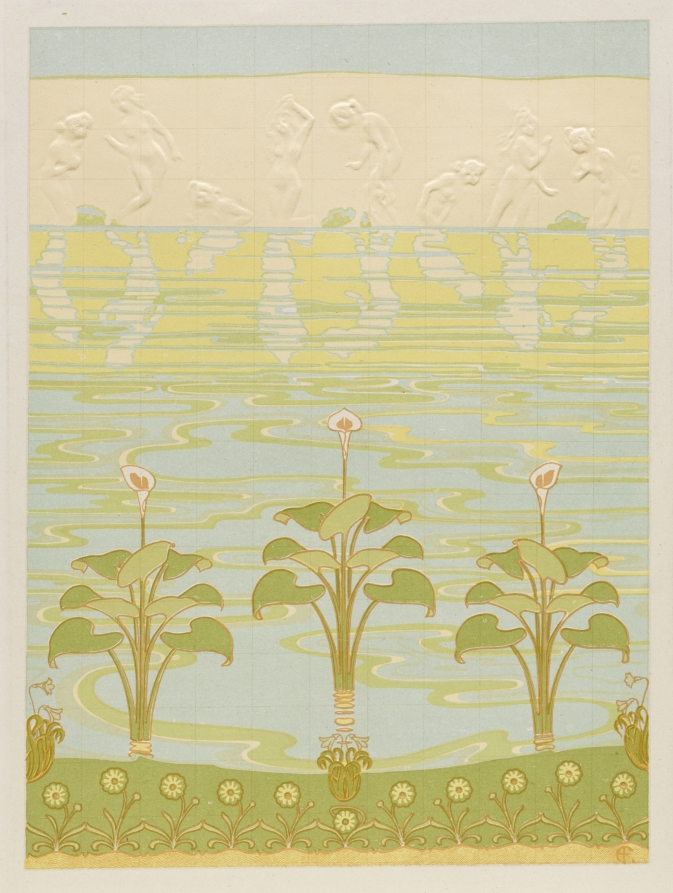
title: Decoration in Enameled Tiles for Bathroom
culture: France, late 19th century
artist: Félix Albert Anthyme Aubert (French, 1866–1940)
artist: and Alexandre-Louis-Marie Charpentier (French, 1856–1909)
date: 1898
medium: embossed color lithograph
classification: Print